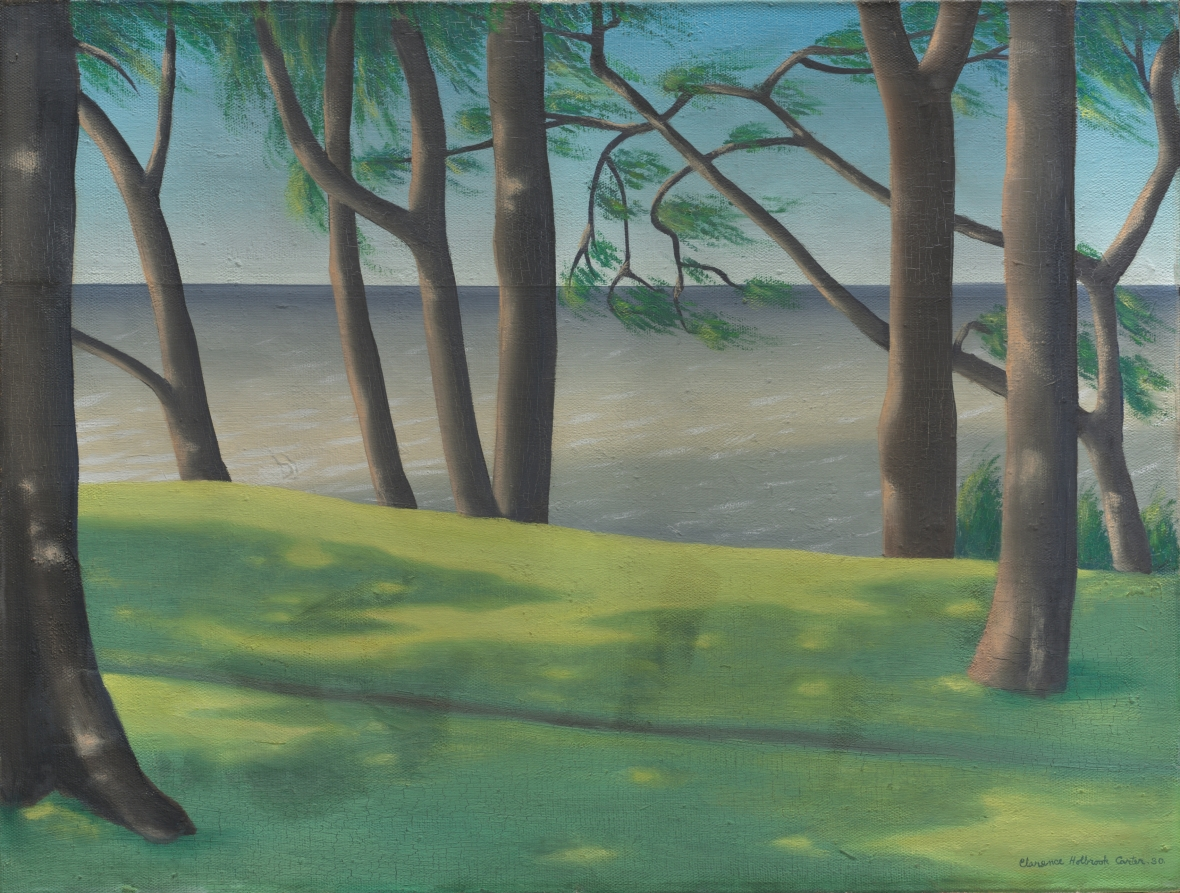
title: Lake Erie Patterns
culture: America, Ohio, Cleveland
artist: Clarence Holbrook Carter (American, 1904–2000)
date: 1930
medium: oil on canvas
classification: Painting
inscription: signed lower right corner: Clarence Holbrook Carter